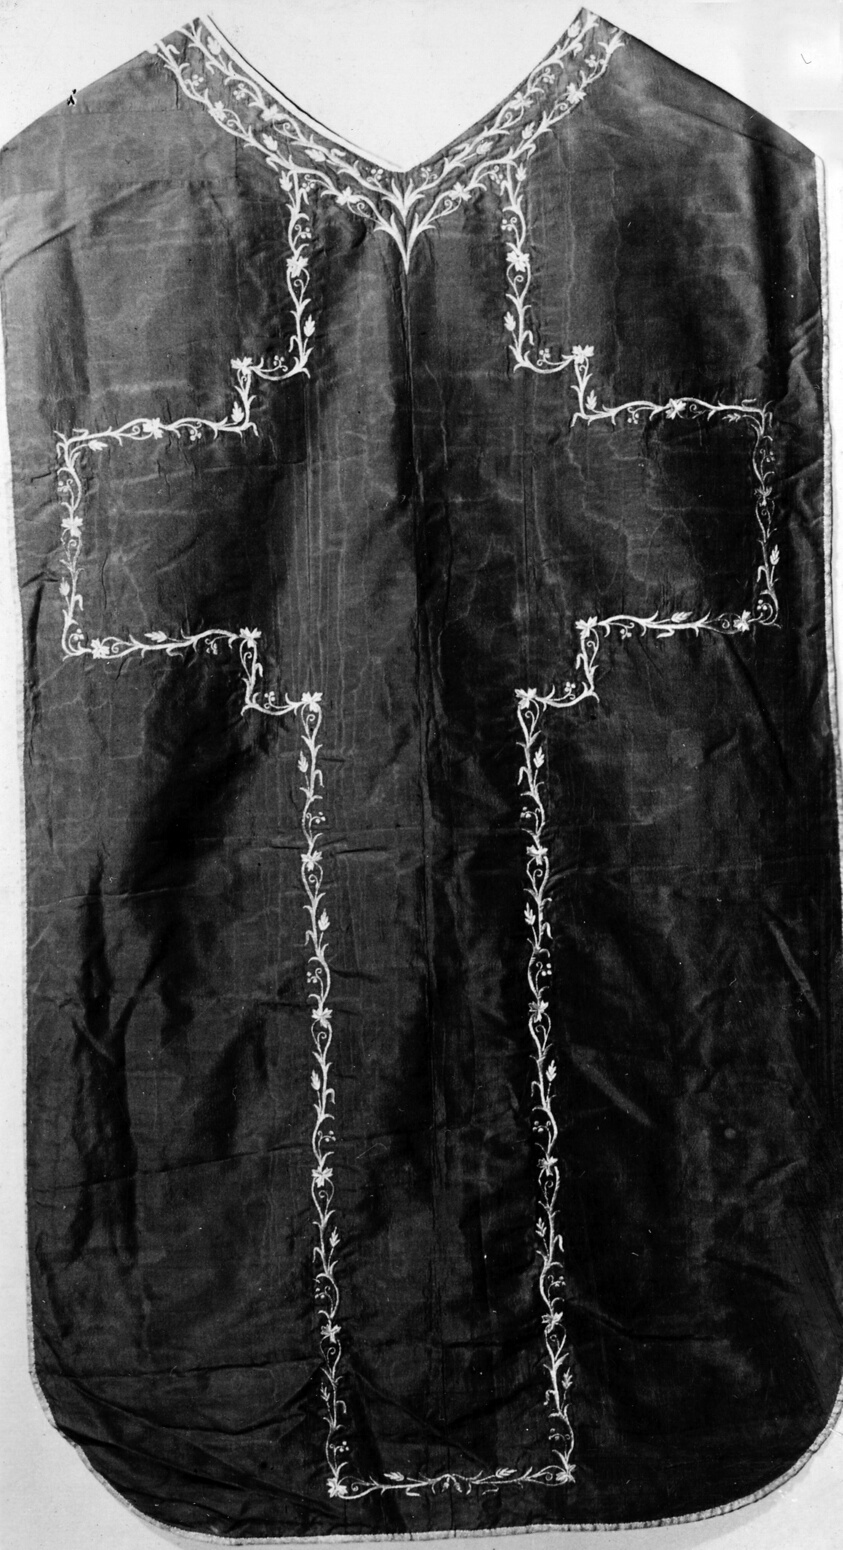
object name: Textile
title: Chasuble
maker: Spain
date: 18th/19th century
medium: Purple silk on one side and green silk on other; meander borders embroidered in silver thread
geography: Spain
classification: textile; needlework (visual works); liturgical; costume